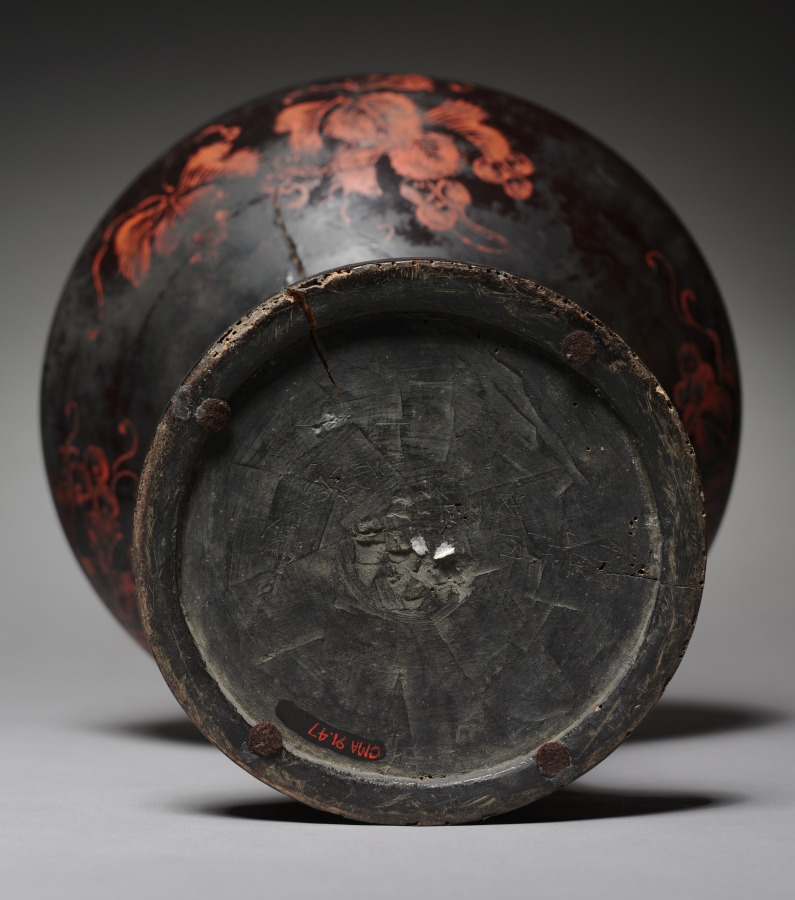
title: Sake Flask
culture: Japan, Muromachi period (1392–1573)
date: 1500s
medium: Black laquered wood with red lacquer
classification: Lacquer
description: This flask contained rice wine, or sake. Its wood body was shaped by a lathe before black lacquer was applied to the surface. A red lacquer design of grapevines, an auspicious motif, covers the surface. With their numerous, long-lasting fruits, grapevines traditionally symbolized fertility and longevity in East Asia.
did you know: The evocative imagery of brushed leaves and bunches of grapes suggest that the artist referred to a particular painting when decorating this vase.